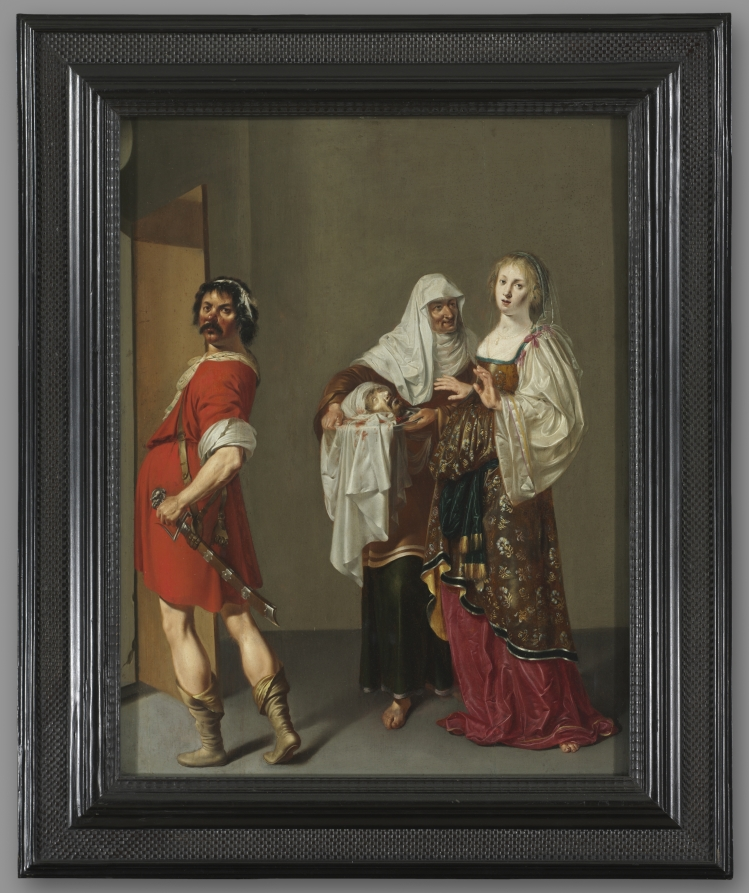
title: Salome with the Head of Saint John the Baptist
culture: Netherlands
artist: Jacob Duck (Dutch, c. 1600–1667)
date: mid-1600s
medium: oil on wood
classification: Painting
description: The colorful, exotic garments worn by the woman at the right demonstrate Jacob Duck’s skill in painting luxurious surfaces: she is Salome, daughter of Herodias. According to the New Testament, Herodias bore a grudge against John the Baptist, who condemned her marriage to Herod, ruler of Galilee and Perea. At a celebration dinner, Salome so charmed Herod with her dancing that he offered her anything she desired—and Herodias convinced Salome to demand John the Baptist’s head. Rather than depicting the actual execution, Duck focused on the executioner’s muscled physique as he departs the scene, turning to look at the viewer after having presented Salome with John’s severed head.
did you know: The pommel of the executioner's sword is decorated with a grotesque head, suggesting an ancient or exotic setting for this event.